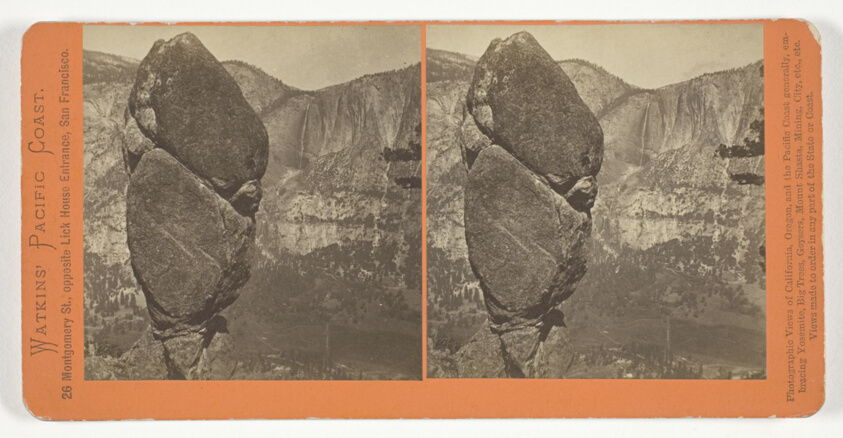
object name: Photograph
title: Agassiz Column from Glacier Point Trail, Yosemite, from the series "Watkins' Pacific Coast"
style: 19th century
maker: Carleton E. Watkins; American, 1829-1916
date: 1861/76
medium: Albumen print, stereo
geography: United States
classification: stereograph (albumen); albumen silver print; photographic process; photography; photograph